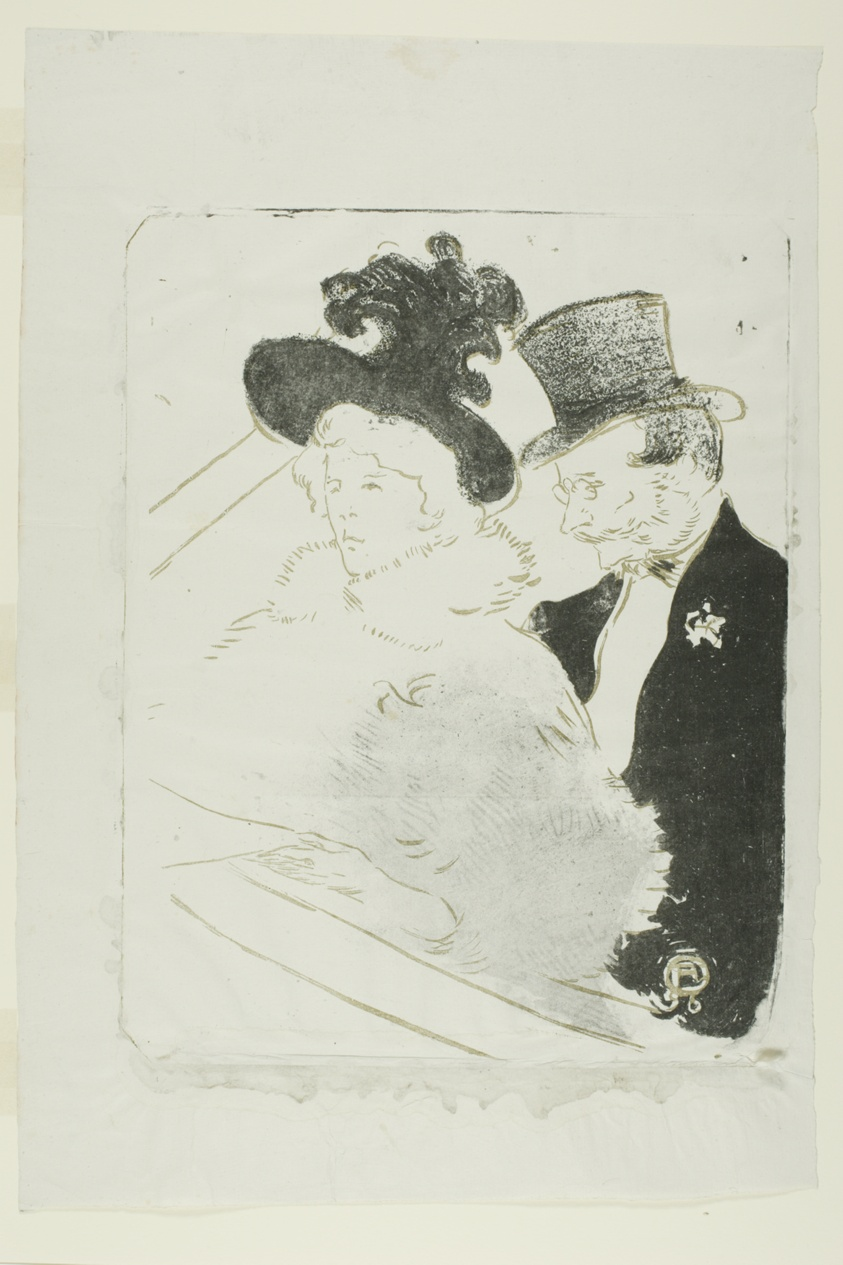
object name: Print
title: At the Concert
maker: Henri de Toulouse-Lautrec (French, 1864-1901)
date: 1896, printed 1946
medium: Zincograph on grayish-ivory laid chine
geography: France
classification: zincograph; print; prints and drawing